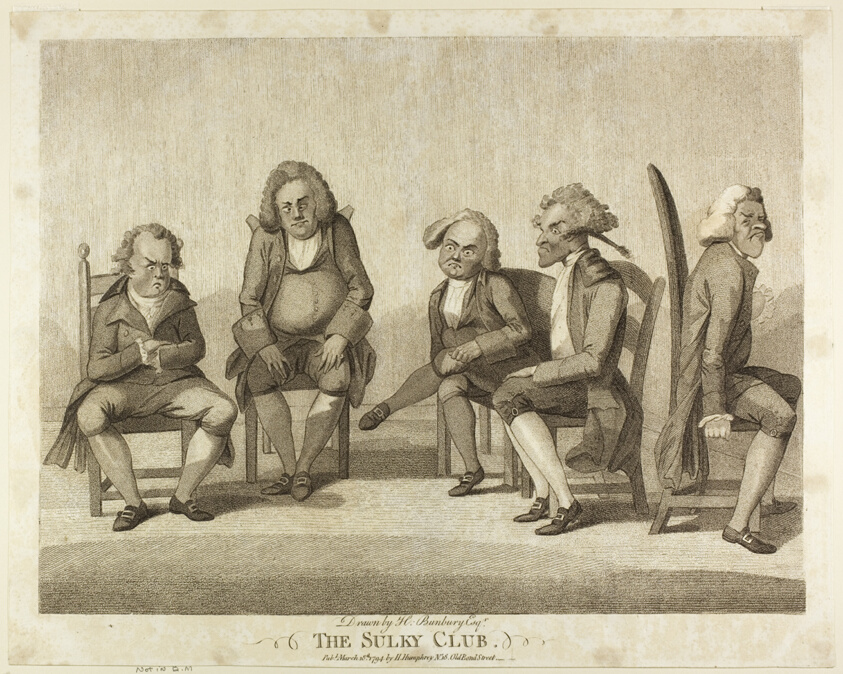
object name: Print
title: The Sulky Club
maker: Henry William Bunbury (English, 1750-1811)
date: published March 18, 1794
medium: Lithograph on paper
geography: England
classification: etching; print; prints and drawing